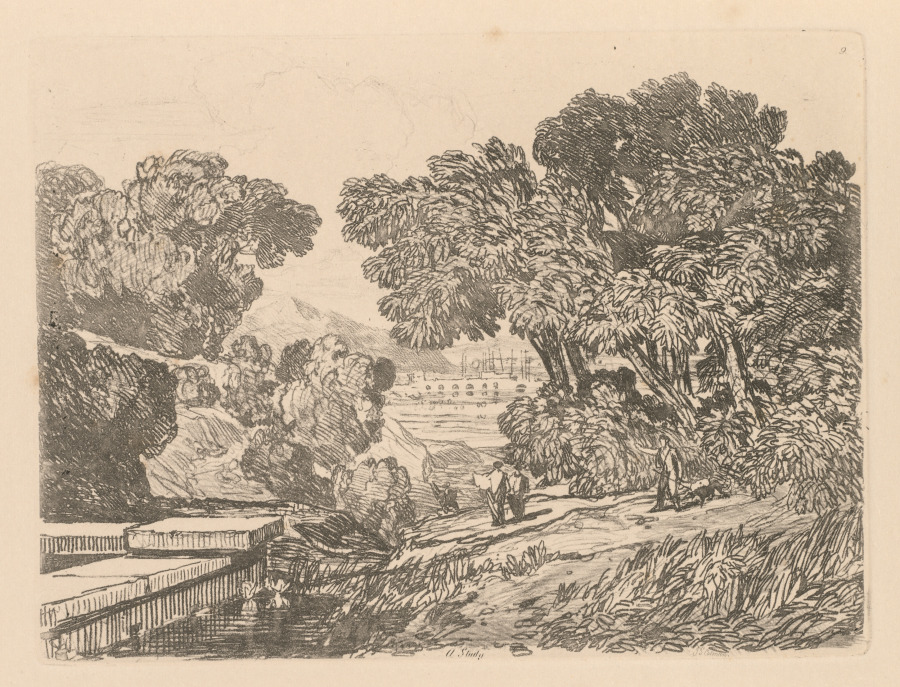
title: Liber Studiorum: Plate 9, A Study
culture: England, 19th century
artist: John Sell Cotman (British, 1782–1842)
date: 1838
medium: softground etching, from a bound volume containing 48 plates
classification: Bound Volume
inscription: In plate, within image, upper right: 9; in plate, below image: A Study J S Cotman